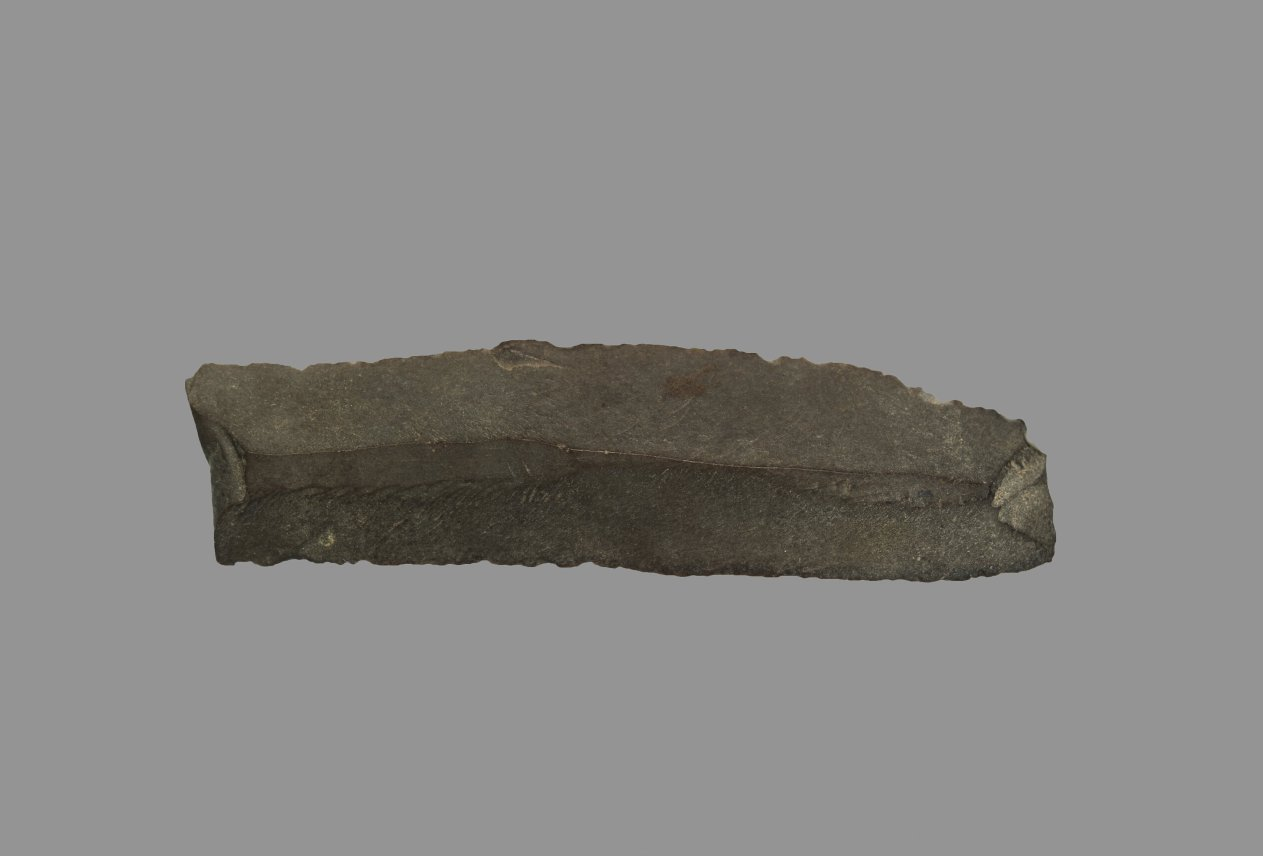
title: Sickle Blade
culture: Egypt, Middle Kingdom (2040–1648 BCE), Dynasty 12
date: 1980–1801 BCE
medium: flint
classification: Implements